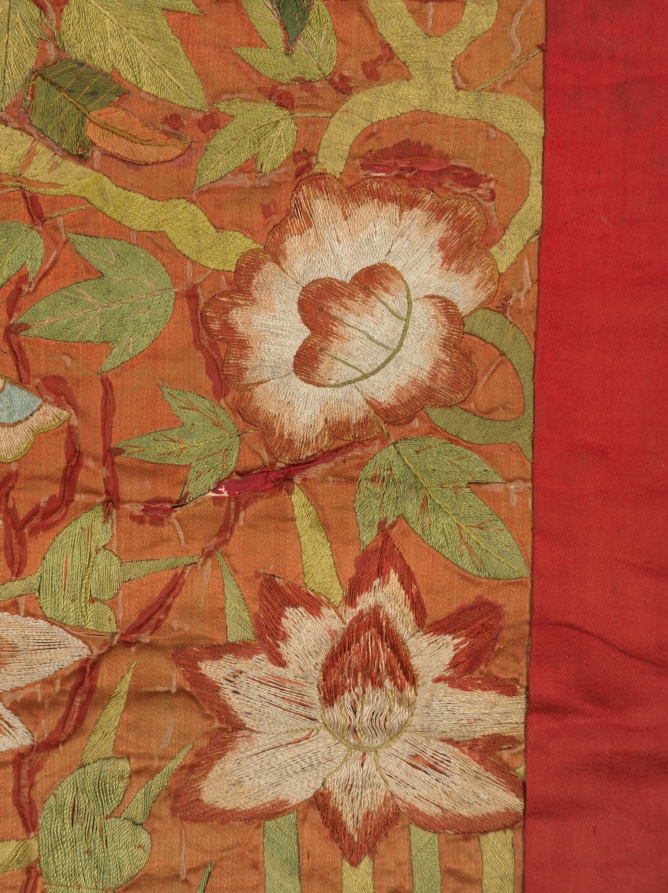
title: Bridal Robe (Hwarot)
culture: Korea, Joseon dynasty (1392–1910)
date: 1700s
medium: Satin weave silk; silk embroidery; paper edging on neck and sleeves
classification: Garment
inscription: [二姓]之合 / [百]福之源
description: This bride's robe is exquisitely embroidered with various symbols of happiness in colorful silk threads. Butterflies stand for marital happiness; the phoenix, numerous offspring; and lotus flowers and white cranes, longevity. Yet, the bridal robe does not attest to the life of luxury. To the contrary, many traces of repairs, trimmings, and patchwork reflect Joseon period women’s commitment to value neo-Confucian aesthetics of frugality and modesty. Substantial repairs and patching reveal that this robe served as an important communal resource to be shared and passed down through several generations. Its collar and sleeves are covered in thick white paper; this paper is replaced with new paper for each bride, while the robe itself was reused for decades.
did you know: This bride's robe was not made for one specific bride, but rather was shared and passed down to many brides.